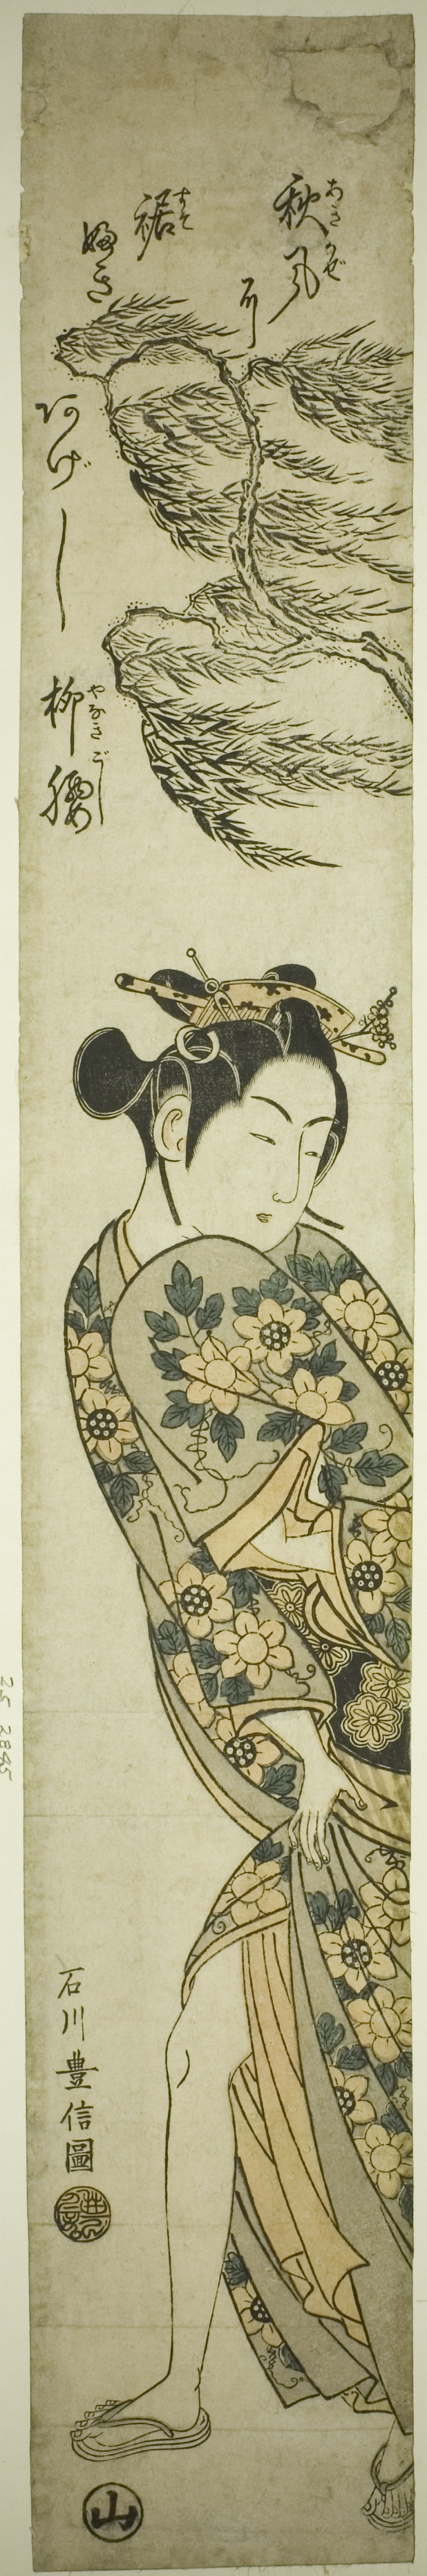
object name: Print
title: Young Woman Walking on a Windy Day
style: Japanese (culture or style)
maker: Ishikawa Toyonobu (Japanese, 1711-1785)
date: c. 1758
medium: Color woodblock print; hashira-e, benizuri-e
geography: Japan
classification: woodblock print; print; asian art